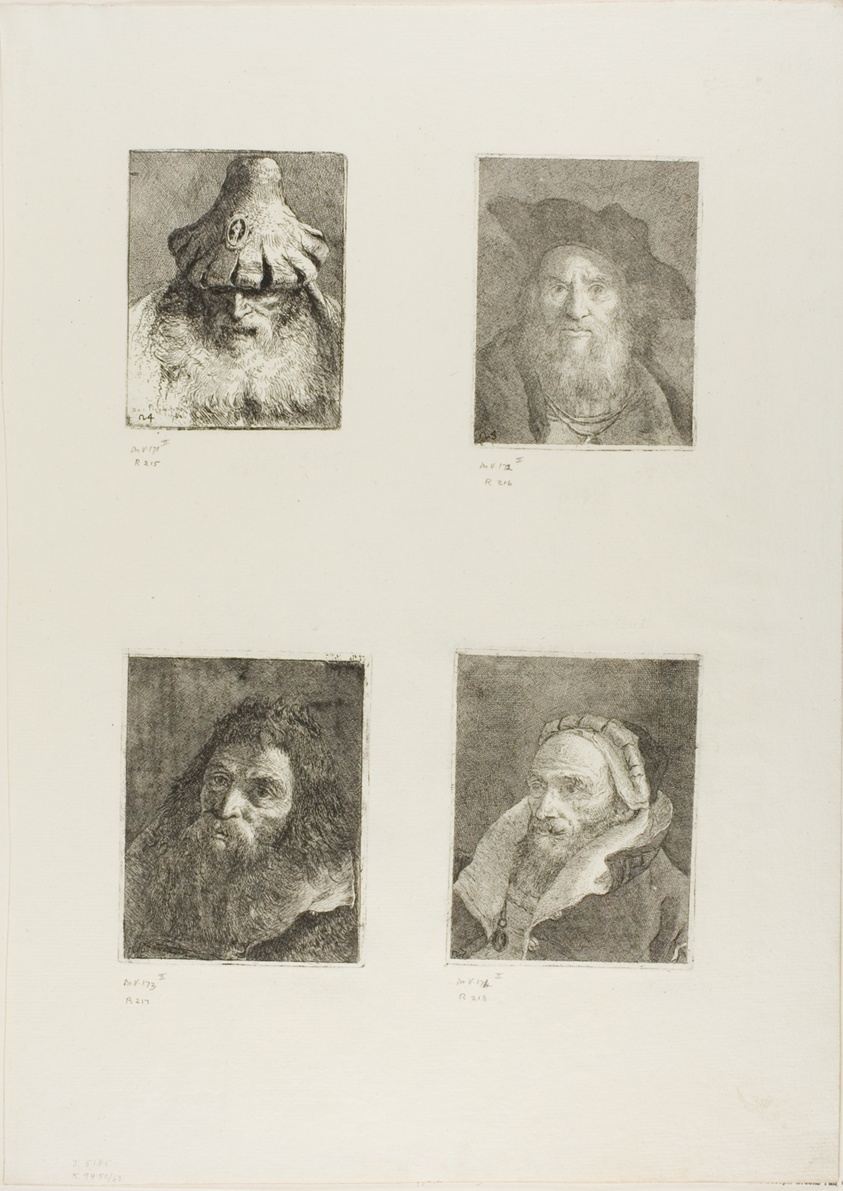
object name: Print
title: Old Man with a Conical Hat, Old Man with a Hat, Old Man with a Beard, Bearded Old Man with a Cap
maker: Giovanni Domenico Tiepolo (Italian, 1727-1804)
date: 1775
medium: Four etchings on ivory laid paper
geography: Italy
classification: etching; print; prints and drawing